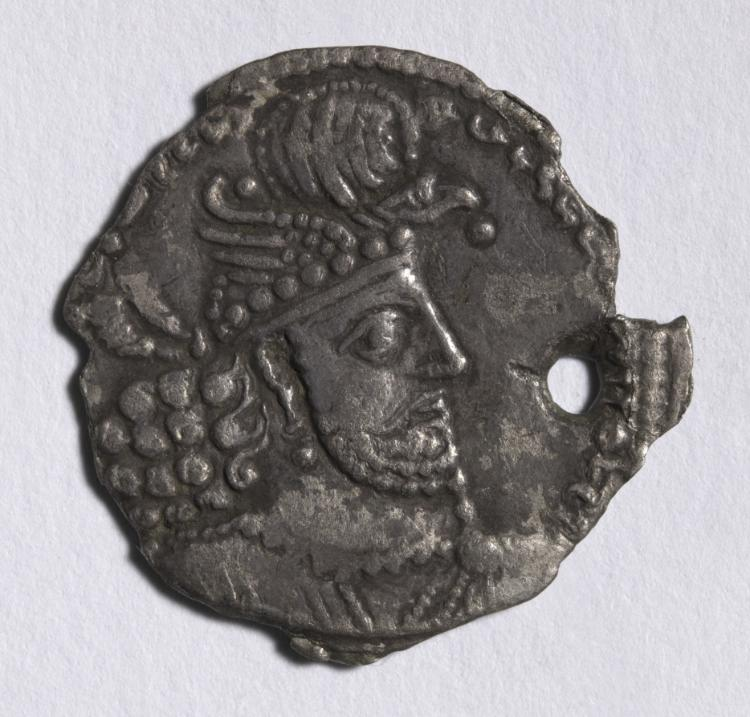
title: Drachm: Bust of Hormizd II Wearing Crown (obverse)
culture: Iran, (minted), Sasanian Empire (224–651 CE), reign of Hormizd II (303–309)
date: 302–9 CE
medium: silver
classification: Coins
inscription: 𐭬𐭦𐭪𐭠𐭠𐭭𐭬𐭫𐭪𐭠𐭠𐭩𐭫𐭠𐭭𐭬𐭭𐭪𐭲𐭥𐭬𐭭𐭩𐭦𐭣𐭠𐭭 𐭬𐭦𐭣𐭩𐭮𐭭𐭡𐭢𐭡𐭥𐭧𐭬𐭦𐭣